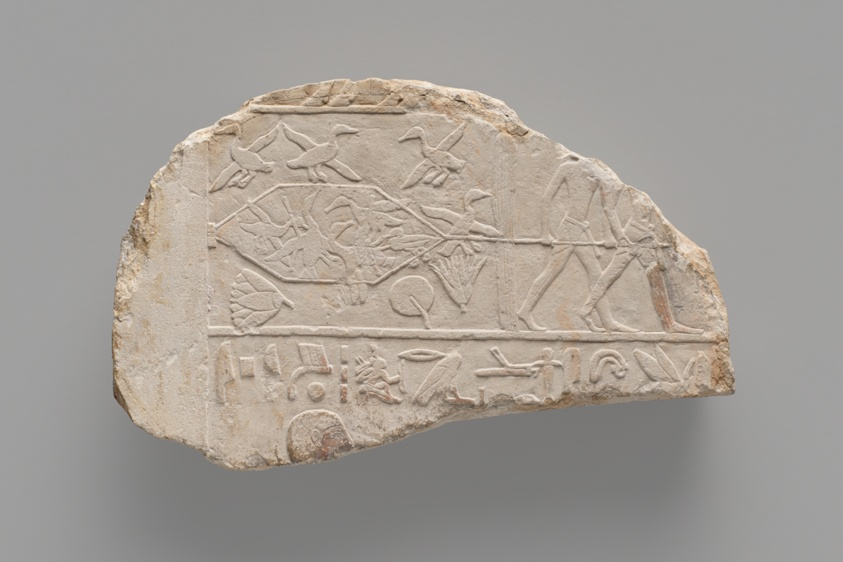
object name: Architectural fragment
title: Relief Fragment Depicting Ipi and Fowling in the Marshes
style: first intermediate period, ancient, egyptian, tenth dynasty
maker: Egyptian; Saqqara, Teti Pyramid Cemetery, offering niche of Ipi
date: First Intermediate Period, Dynasty 10, about 2050 BCE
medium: Limestone with traces of pigment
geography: Saqqara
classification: architectural fragment; stone; sculpture; ancient art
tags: birds, funerary art, Hieroglyphs, lotus, men